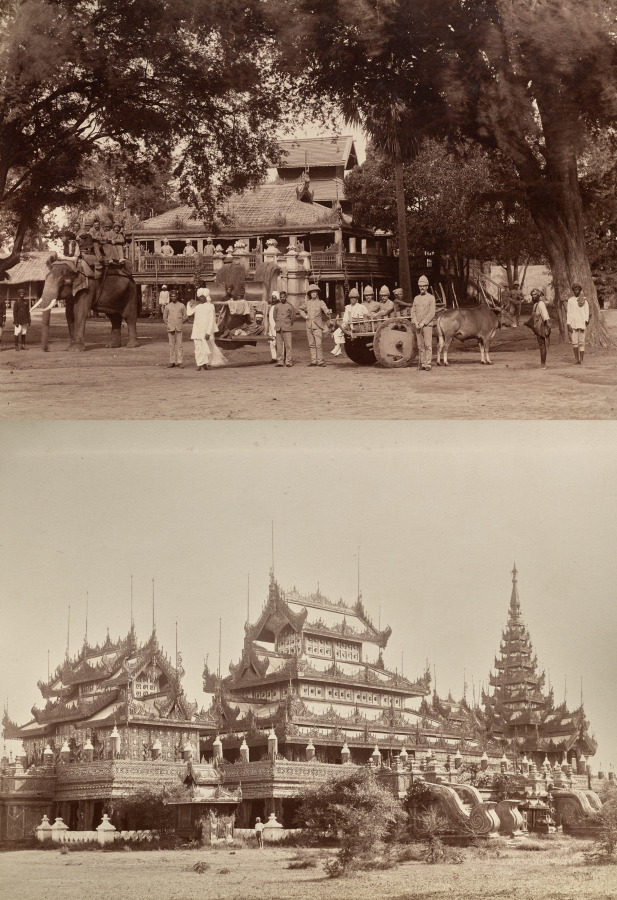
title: Untitled: (British soldiers, man on palequin, and indigenous workers); (ornate buildings, verso)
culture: England, 19th century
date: 1870s-1880s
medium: Album page with two albumen prints mounted on both sides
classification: Photograph